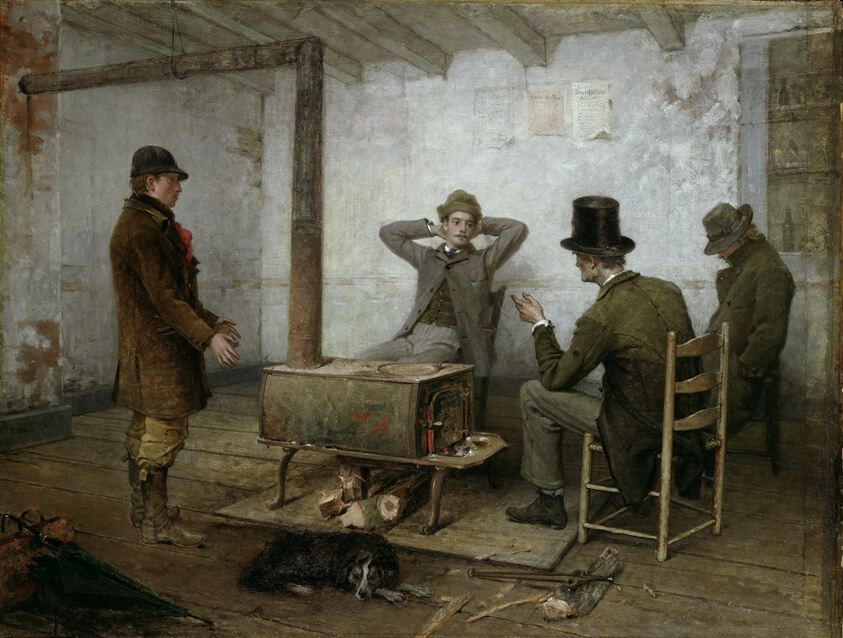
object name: Painting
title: A Friendly Warning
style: Realism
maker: Thomas Hicks (American, 1823–1890)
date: 1881–90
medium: Oil on canvas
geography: United States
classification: painting; american arts